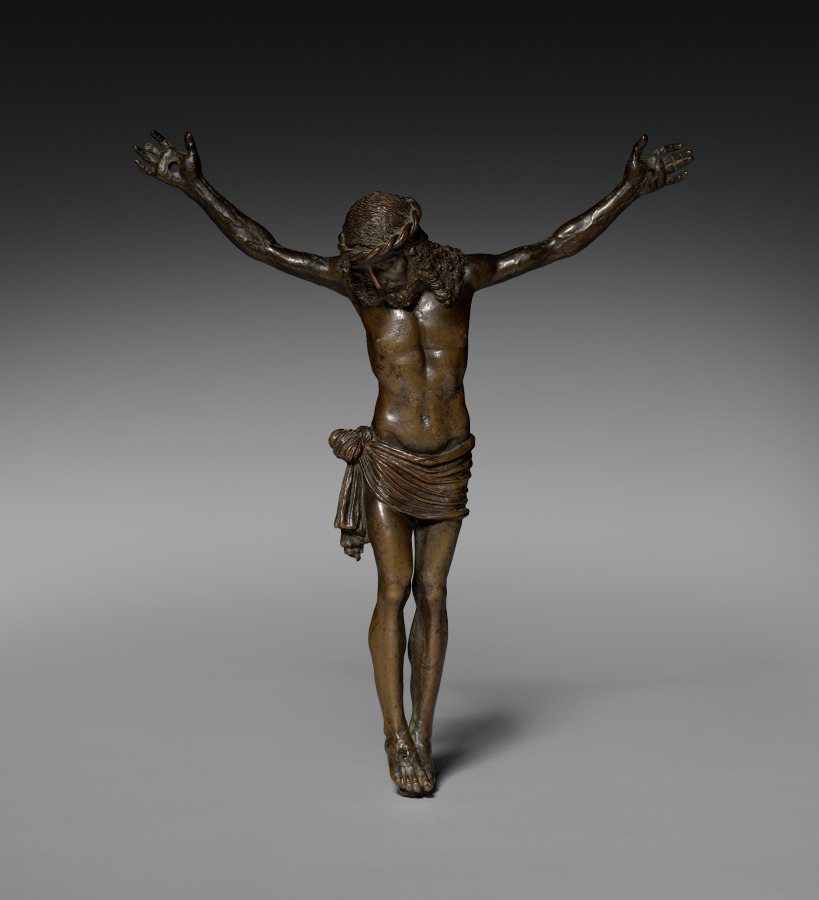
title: Crucified Christ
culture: Italy, Ravenna, 16th century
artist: Severo da Ravenna (Italian, c.1496–c.1543)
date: c. 1500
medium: bronze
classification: Sculpture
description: The highly finished surface of this sculpture, including the back, suggests it belonged to a refined collector. Small sculptures would often be held to admire details such as the strands of hair streaming onto Christ’s shoulders, the prominent veins in his forearms, and the intricate knotted cloth at his side.